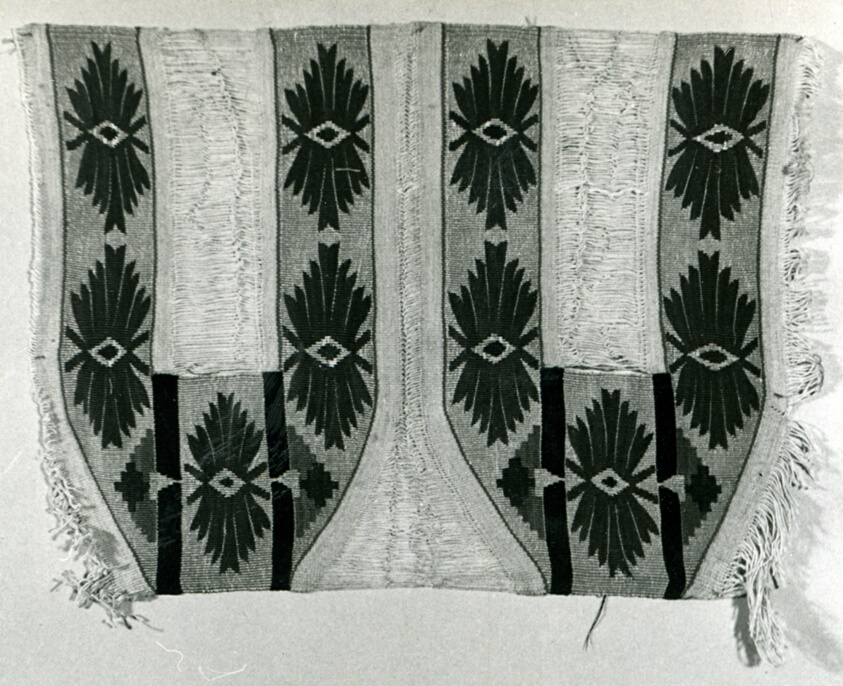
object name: Textile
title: Moccasin Slippers (One pair; Uncut)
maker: France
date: 1875/1900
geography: France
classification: textile; costume; costume accessory - shoe; weaving; dress (garment); clothing